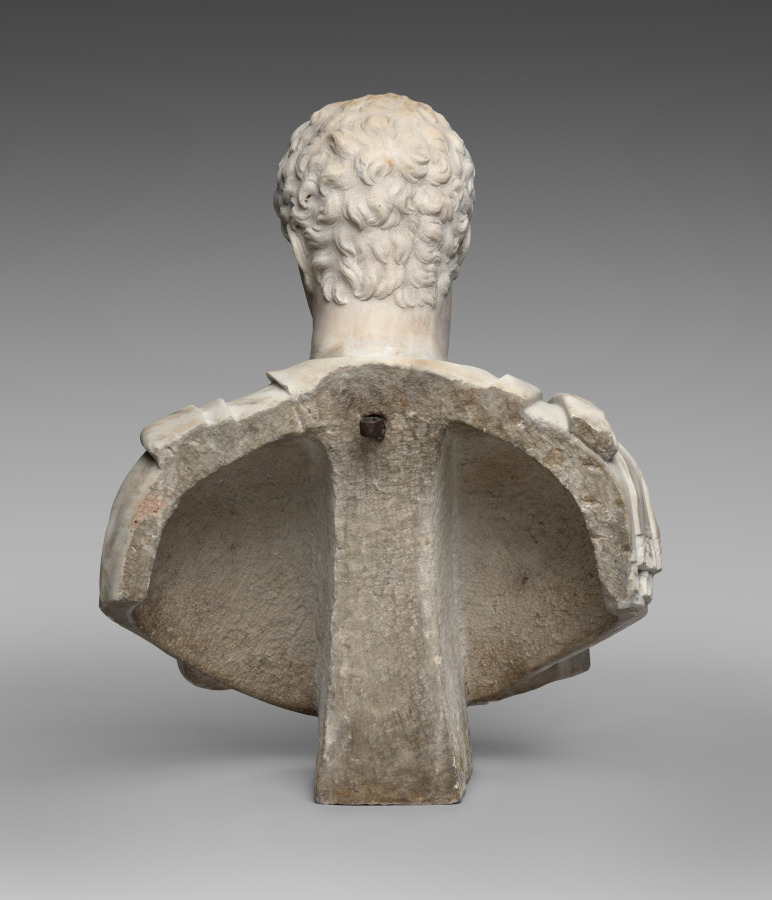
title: Bust of a Roman General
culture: Italy, 16th century or later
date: 1500s or later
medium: marble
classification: Sculpture